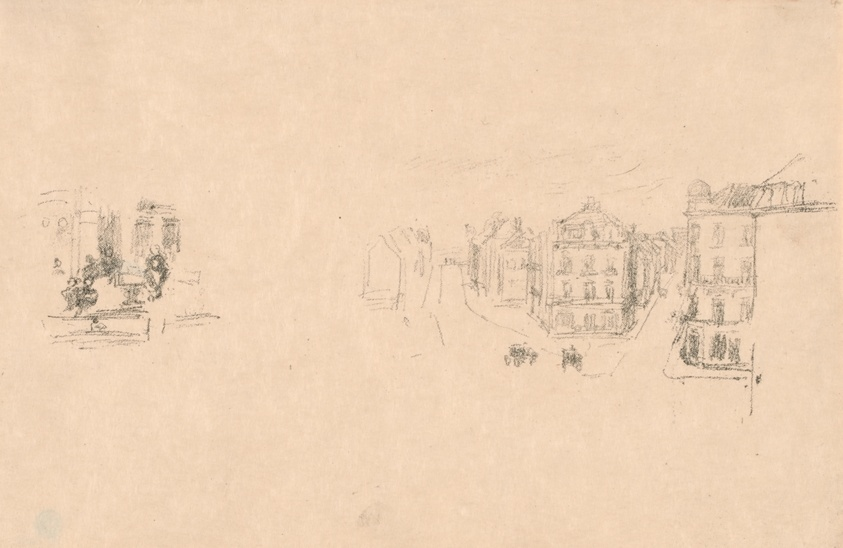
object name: Print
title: Two Trial Sketches: A. Grande Rue, Dieppe; B. An Interior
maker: James McNeill Whistler (American, 1834-1903)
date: probably 1891, printed posthumously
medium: Transfer lithograph in black on cream wove Japanese vellum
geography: United States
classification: transfer lithograph; lithograph; print; prints and drawing